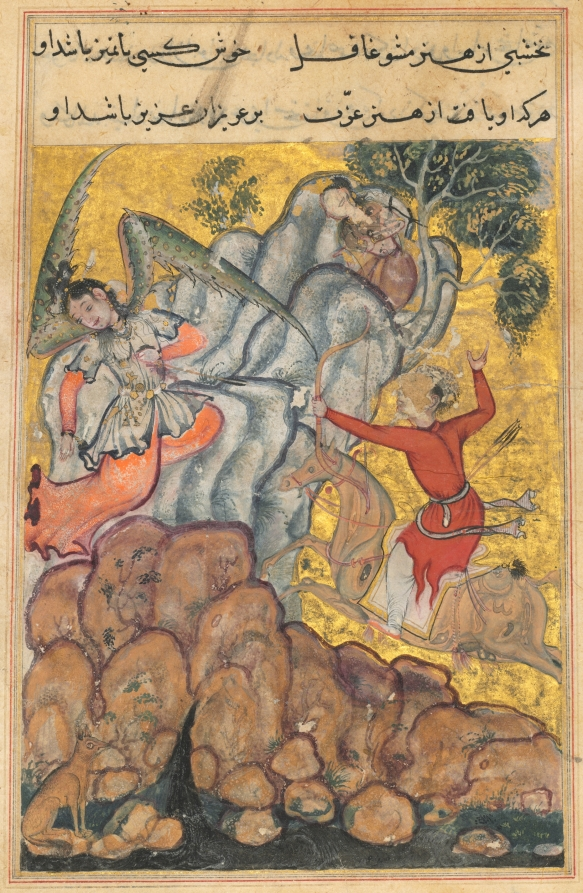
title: The third suitor, who is an archer, shoots the wicked fairy who has imprisoned Zuhra. He rides on a magic horse prepared by the second suitor and is led to the spot by the divining prowess of the first, from a Tuti-nama (Tales of a Parrot): Thirty-fourth Night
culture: Mughal India, court of Akbar (reigned 1556–1605)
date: c. 1560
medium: gum tempera, ink, and gold on paper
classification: Painting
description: In the upper-right corner, Zuhra is imprisoned high atop a rocky outcrop. The evil fairy that captured her falls dead from the side of the mountain with an arrow in her chest. Zuhra’s three suitors have combined their unique talents in order to save her, yet it is ultimately the third who proves himself most worthy of her love.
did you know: The fairy is called a “peri” in Persian.